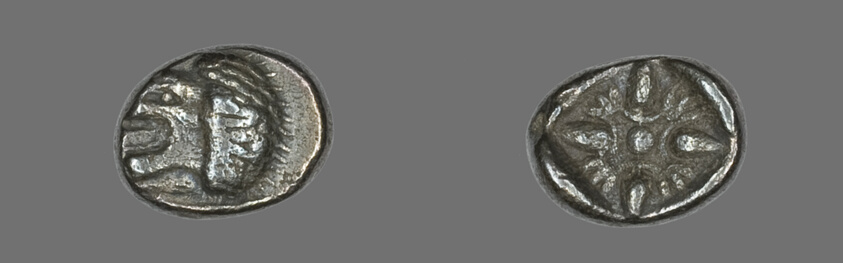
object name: Coin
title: Diobol (Coin) Depicting a Lion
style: greek, ancient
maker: Greek, minted in Miletus, Ionia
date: early 5th century BCE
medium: Silver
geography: Roman Empire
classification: coin; ancient art